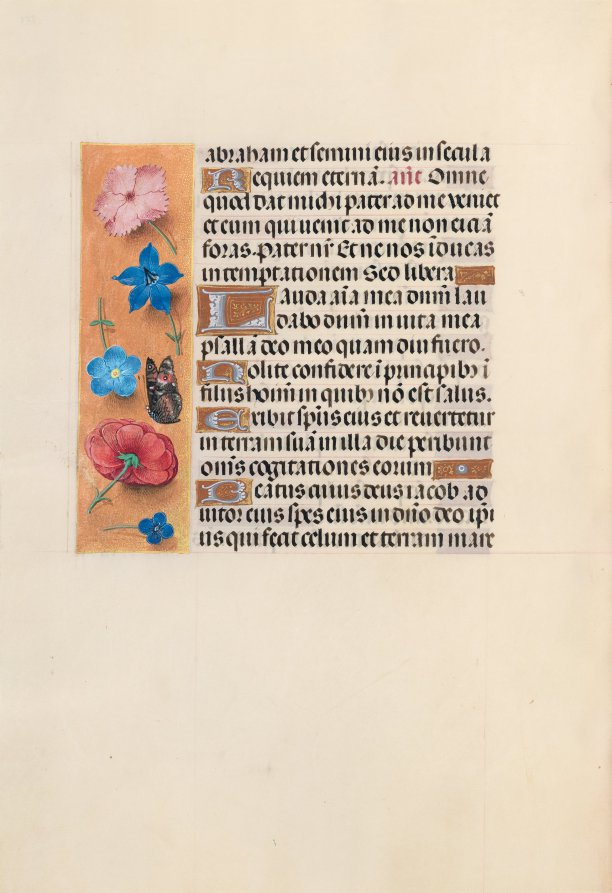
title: Hours of Queen Isabella the Catholic, Queen of Spain: Fol. 224v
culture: Flanders, Ghent and Bruges, late 15th century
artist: Master of the First Prayerbook of Maximillian (Flemish, c. 1444–1519)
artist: and Associates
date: c. 1500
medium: ink, tempera, and gold on vellum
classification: Bound Volume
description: This manuscript was illuminated by a circle of at least five highly organized manuscript painters active in the Flemish cities of Ghent and Bruges. The principal illuminator was Alexander Bening, who painted the majority of the book's miniatures. Manuscripts produced by this circle of artists are renowned for the decoration of their borders, which typically feature a rich variety of realistically-painted flowers, birds, and butterflies. This prayer book, called a book of hours, was intended not for a cleric, but for the private devotions of a lay person-in this case, Isabella the Catholic, Queen of Spain (1451-1504). Isabella's coat of arms embellishes the book's frontispiece. It is unlikely that the book was commissioned by the Queen herself; rather, she probably received it as a diplomatic gift from someone courting her patronage, perhaps Cardinal Francisco Jimenez de Cisneros. A Franciscan friar, Jimenez was dependent upon Isabella for his advancement, first to the post of Queen's confessor in 1492, and then to Archbishop of Toledo in 1495.